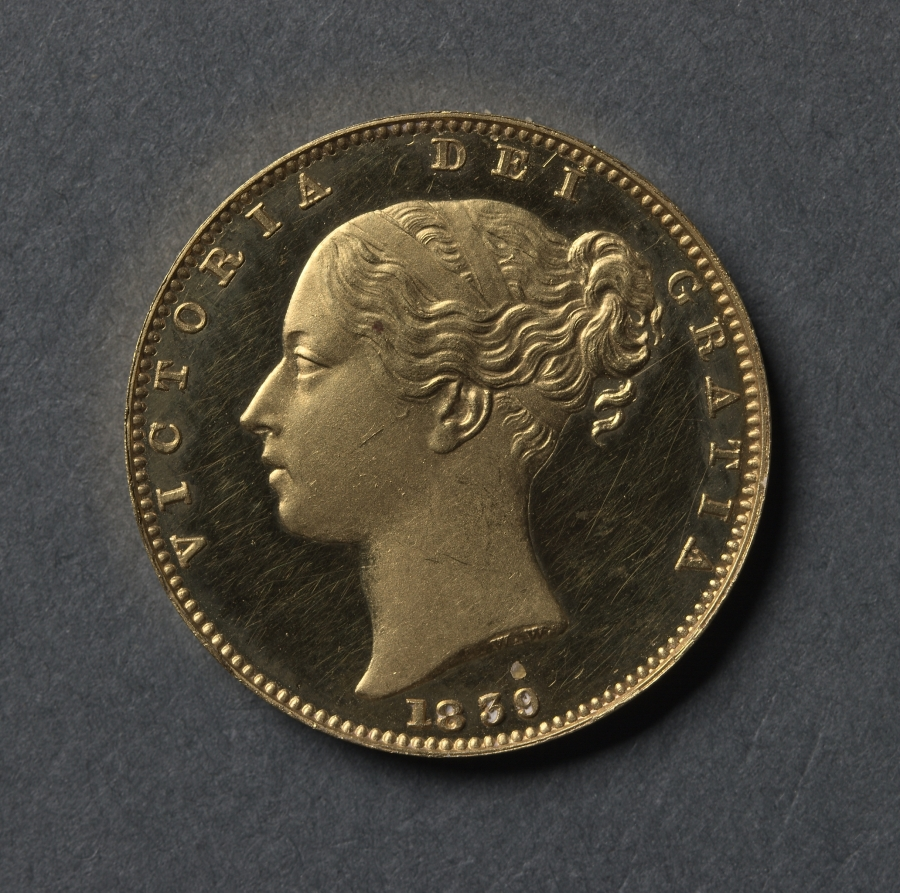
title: Sovereign: Victoria (obverse)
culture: England, Victoria, 1837-1901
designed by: William Wyon (British, 1795–1851)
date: 1839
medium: gold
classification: Coins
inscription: VICTORIA DEI GRATIA; below: 1839.